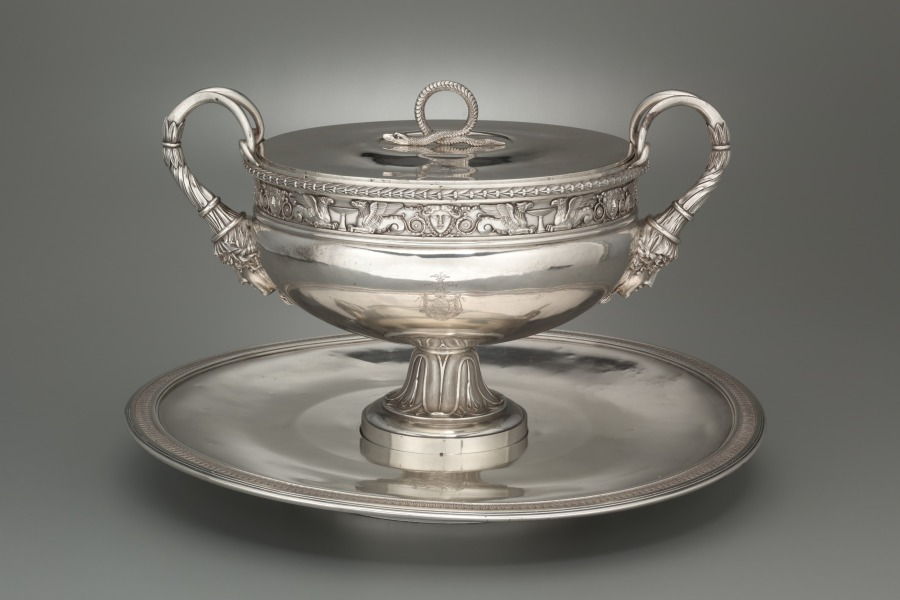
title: Covered Tureen on Stand (Pot à oille)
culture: France, late 18th-early 19th Century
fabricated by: Henry Auguste (French, 1759–1816)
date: 1797–98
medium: silver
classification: Silver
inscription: [Coat-of-arms of Amoral don Federico Carlos Gravina on bowl; cover; stand]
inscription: [Assay mark for large-sized work, 1798-1809, lining exterior; tureen foot exterior]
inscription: [Assay mark for medium-sized work, 1798-1809, beneath stand foot; on edge of cover]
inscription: [Maker's mark of Henri Auguste, master silversmith in 1785, beneath tureen foot; beneath stand foot; inside stand foot edge]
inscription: [Official assay mark for first standard silver, Paris, 1798-1809, beneath stand foot; lining exterior; on cover]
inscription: [Official mark for silver imported from countries with customs conventions, 1838-1912, beneath stand foot; edge of cover; tureen lip exterior; lining exterior; on one tureen handle; outside stand foot; tureen foot exterior]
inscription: [Unknown mark, possibly Ceres' profile in square with "E" and "7", beneath stand foot; on cover; rim of lining; tureen foot exterior; tureen lip exterior]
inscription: [Unofficial assay mark for first standard silver, Paris, 1794-1797, beneath foot stand; beneath tureen foot; near tureen handle exterior]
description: This pot-à-oille was designed by master goldsmith Henri Auguste after drawings by draftsman and sculptor Jean Guillaume Moitte. Though many of the neoclassical decorative elements on this piece are pulled from Moitte’s design, Auguste’s final product leaves out much of the proposed ornamentation. Instead this object finds distinction in its large size and smooth expanses of silver that emphasize the purity of its lines.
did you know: The coat of arms on the body of the work corresponds to the family of Federico Carlos Gravina, a Sicilian-Spanish admiral who was known to have had a close diplomatic relationship with Napoleon I.